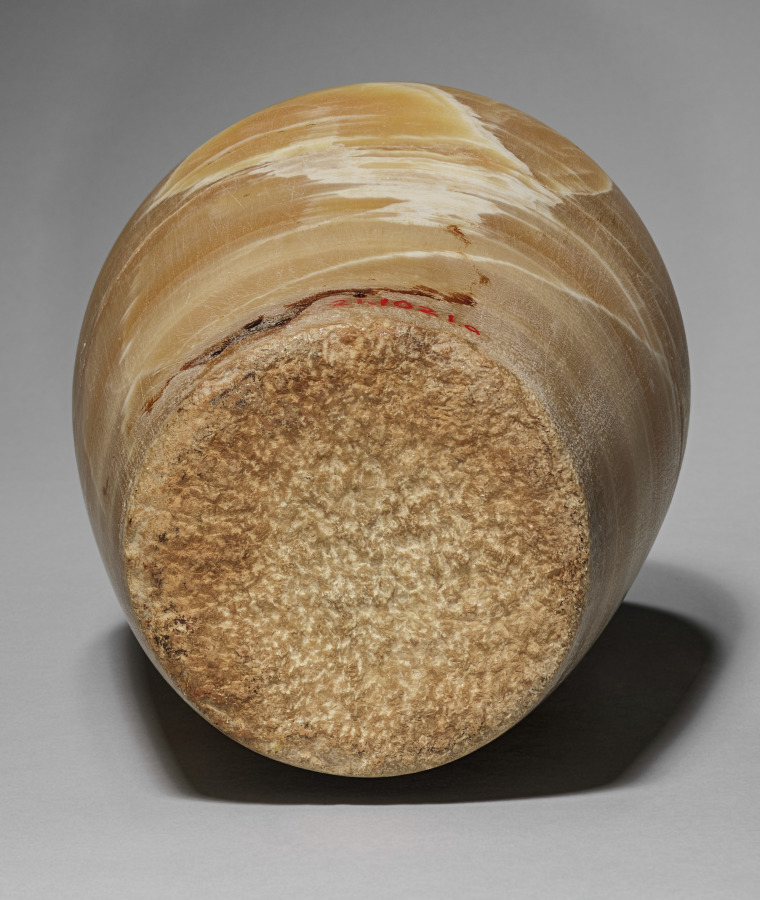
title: Canopic Jar with Jackal's Head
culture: Egypt, Late period (715–332 BCE), Dynasty 26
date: 664–525 BCE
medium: travertine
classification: Funerary Equipment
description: In the process of mummification, the liver, lungs, stomach, and intestines were removed, separately embalmed, and stored in specialized jars known as canopic jars (after a sailor in Greek mythology, who died at the town of Canopus in the Nile Delta and was worshipped there in the form of a human-headed jar). Each organ was identified with one of four funerary deities collectively known as the Sons of Horus: the liver with Imsety (man's head), the lungs with Hapy (baboon's head), the stomach with Duamutef (jackal's head), and the intestines with Qebehsenuef (falcon's head). It was their duty to protect the deceased and restore to him his body parts in the hereafter.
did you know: This jar is made of travertine stone-- subtle in color and with a captivating natural pattern-- with hieroglyphics carved on the front. Such jars were used to hold internal organs of the deceased and to preserve them for the afterlife.